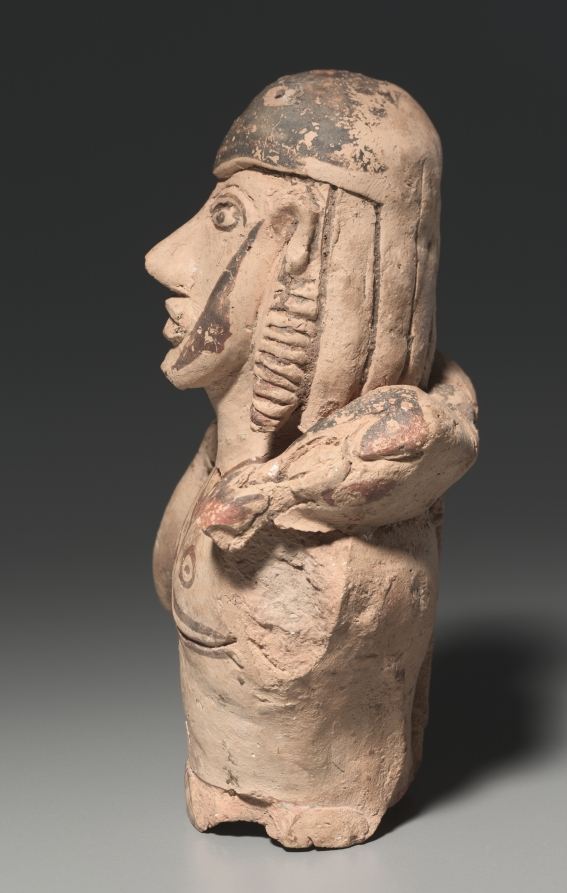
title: Kriophoros (Ram-Bearer), Statuette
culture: Greece, Crete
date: 650–600 BCE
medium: terracotta and polychrome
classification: Sculpture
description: In Greek art, the kriophoros is usually a shepherd or, later, Hermes. This statuette may be unique in presenting a warrior-hero as kriophoros. It is certainly one of the earliest sculptural representations of this type. The figure appears to be wearing a helmet, secured under the chin with a painted strap. Double outlines, reinforced at the bottom with incision and adorned with dotted circles in the area of the nipples, were used to suggest breastplates. A thick waist belt, decorated with painted crosshatched lines, is clearly the heroic zoster (warrior's belt). As described in ancient Homeric poetry, the zoster is the ultimate symbol of valor and prowess, worn by such heroes as the brothers Agamemnon and Menelaos and old King Nestor. This figure is shown in the solemn act of presenting a ram, most likely as a sacrificial offering, to a god or goddess.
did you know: This heroic figure is shown presenting a ram, most likely as a sacrificial offering to a god or goddess.